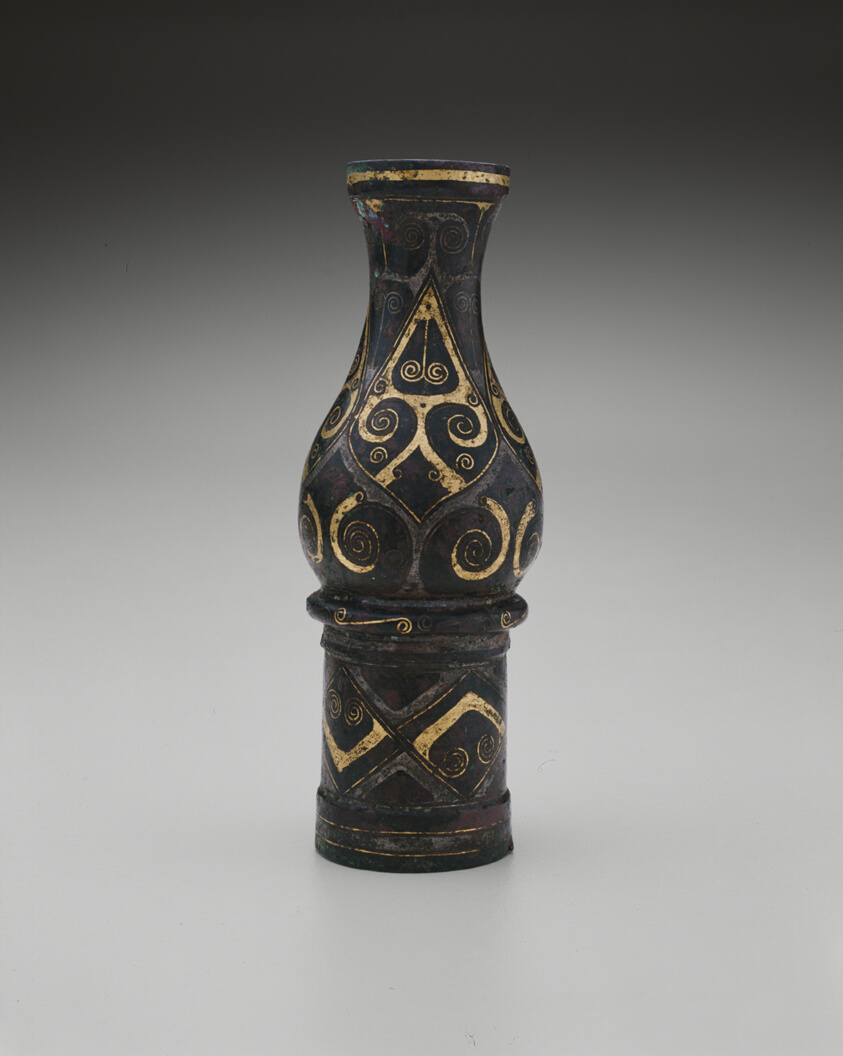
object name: Vessel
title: Tubular Fitting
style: Chinese (culture or style)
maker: China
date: Eastern Zhou dynasty, Warring States period (480–221 B.C.), 4th/3rd century B.C.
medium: Bronze inlaid with gold and silver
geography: China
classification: bronze; metal; fitting; asian art; vessel